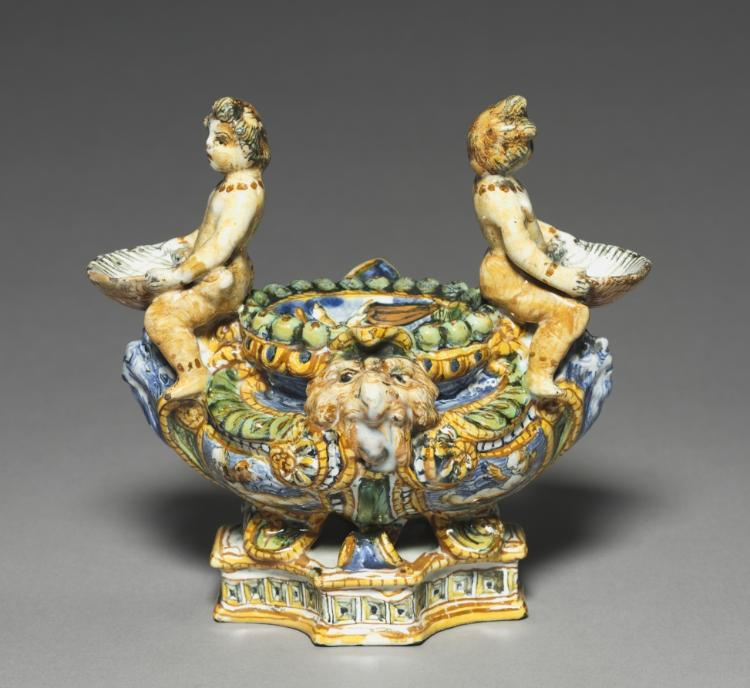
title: Saltcellar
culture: Italy, Urbino, 16th century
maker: circle of the Patanazzi Family (Italian)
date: c. 1570–90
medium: tin-glazed earthenware (maiolica)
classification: Ceramic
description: During the Italian Renaissance of the 1400s and 1500s, nobles and merchants eager to express their wealth and sophistication ordered ceramics for dining, display, and storage. Known as maiolica, because it resembled the brightly colored ceramics from the Mediterranean island of Majorca, these ceramic vessels were covered with a tin glaze that provided an opaque white surface on which colorful decoration could be painted.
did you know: During the Renaissance, salt was an expensive commodity and was used to both season and preserve food.